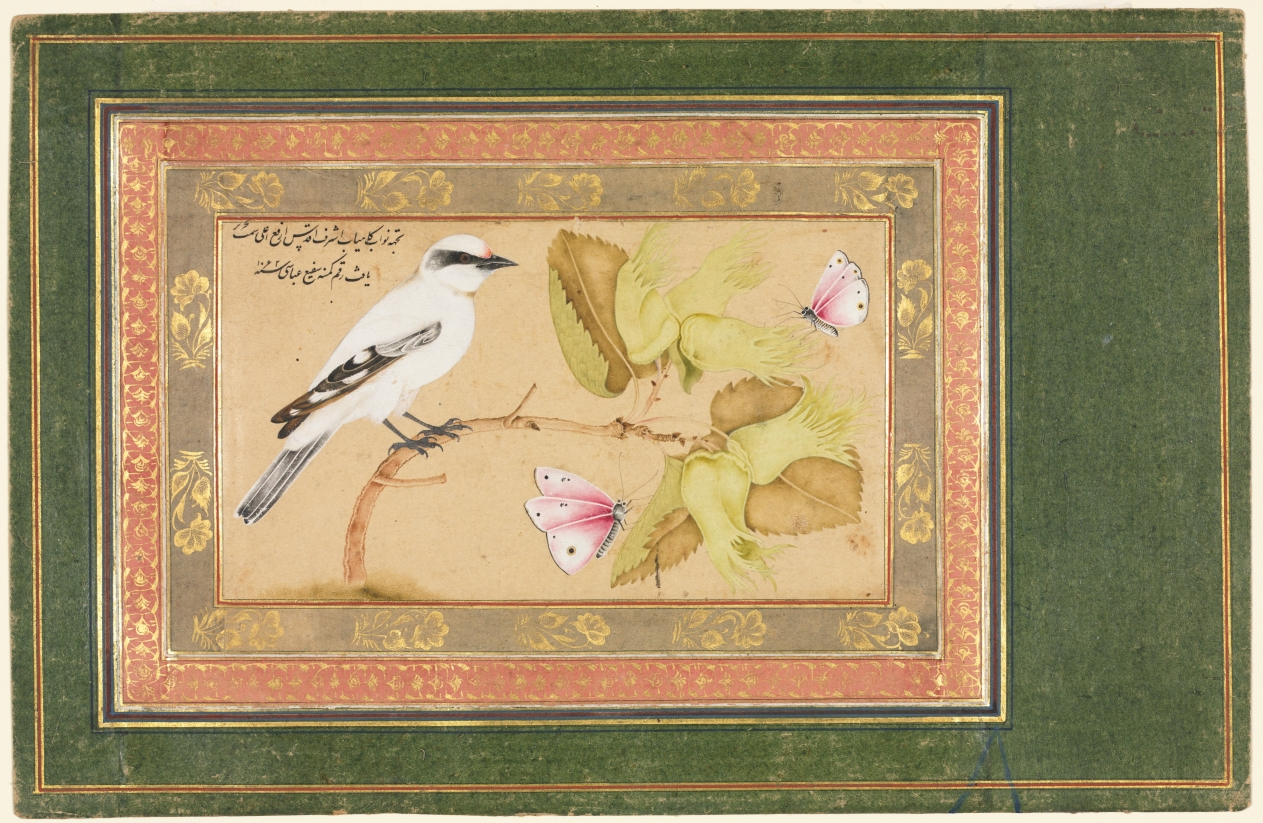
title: Black and White Bird Perched on a Shrub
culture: Iran, Isfahan, Safavid period (1501-1722)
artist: Shafi' Abbasi (Iranian)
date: 1651–52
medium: opaque watercolor, ink, and gold on paper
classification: Manuscript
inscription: "For the successful nawab, the most honorable, most holy, and most high, [who is] of exalted position, it was drawn by the qalam of the humble Shafi' 'Abbasi in the year 1062 (1651–52 AD)."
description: In Iran between the 1630s and 1650s, the court painter Shafi’ ‘Abbasi, son of the renowned painter Riza ‘Abbasi, specialized in a new fashion depicting naturalistic plants and birds, some adapted from European sources such as botanical engravings or herbals. Several have been identified as patterns for textiles, evidenced by pricked holes along the contours, which allowed designs to be transferred to another surface. The inscription indicates that Shafi’ ‘Abbasi made this painting for Shah Abbas II in 1651-52. Presumably, he copied this composition from a European engraving.